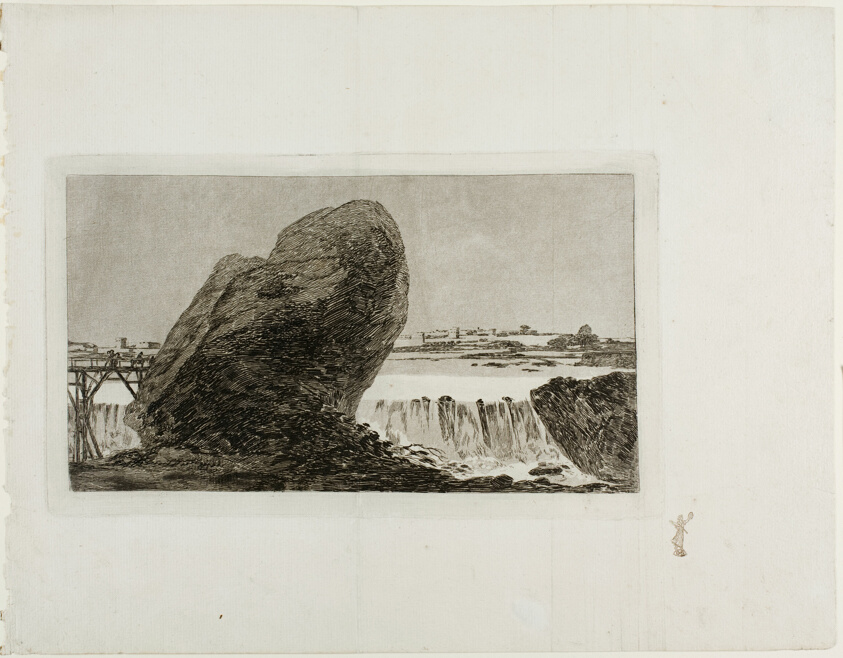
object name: Print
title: Landscape with Waterfall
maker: Francisco José de Goya y Lucientes (Spanish, 1746-1828)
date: before 1810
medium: Etching and burnished aquatint on laid paper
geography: Spain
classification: etching; print; prints and drawing